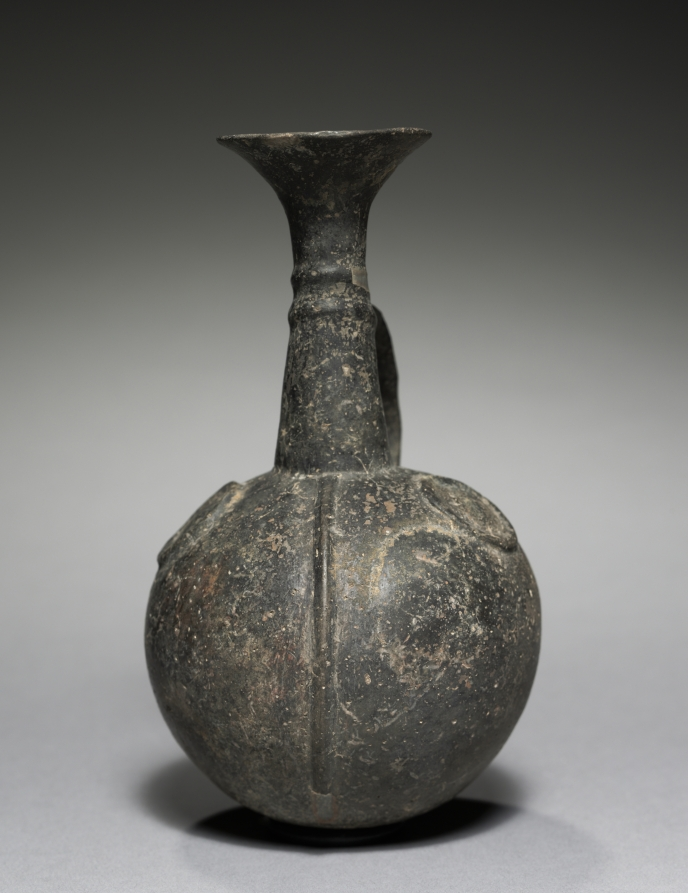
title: Jug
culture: Cyprus, late Cypriot I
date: c. 1600–1450 BCE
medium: base-ring ware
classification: Ceramic